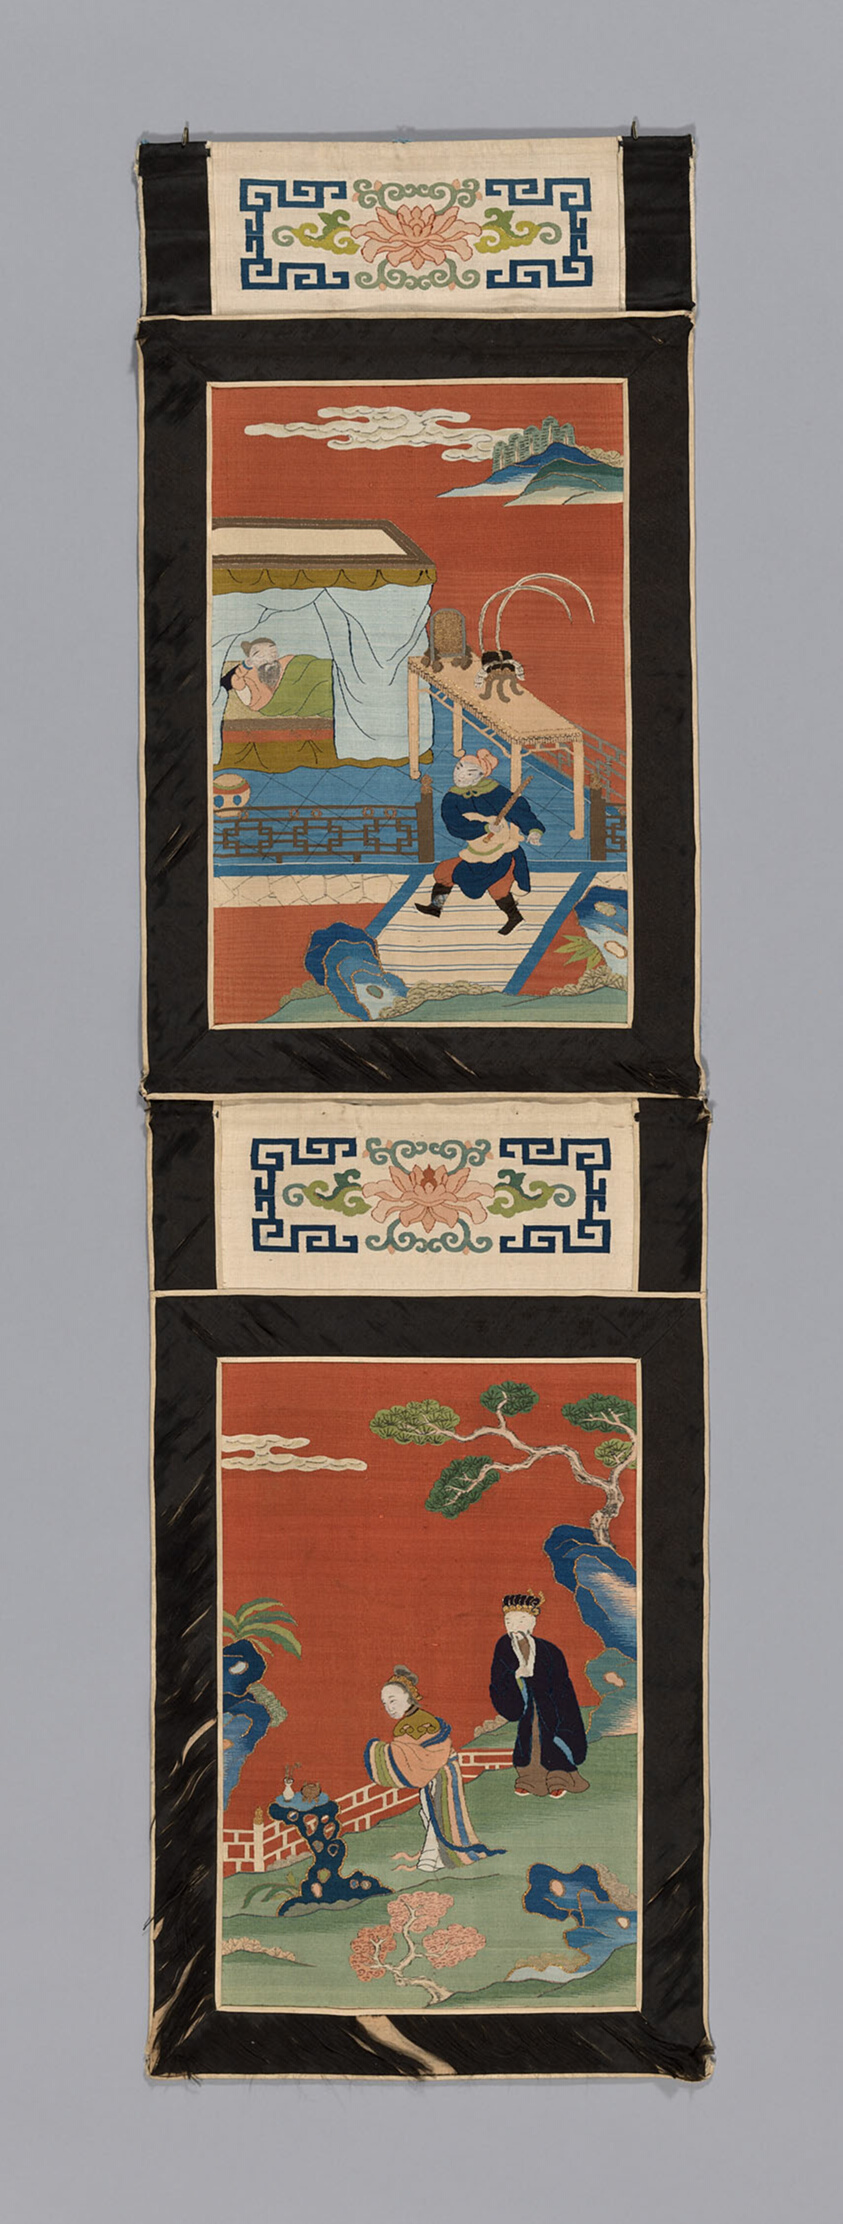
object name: Textile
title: Panel (For a Screen)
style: qing, Chinese (culture or style), asian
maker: China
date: Qing dynasty (1644–1911), 1875/1900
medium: Panel: Silk, gold-leaf-over-lacquered-paper-wrapped silk, slit tapestry weave with extended weft and interlaced outlining wefts; painted; borders: silk and cotton, warp-float faced 5:1 satin weave; inner and outer edges: silk, warp-float faced 4:1 satin weave; lining: cotton, plain weave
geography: China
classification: weaving - tapestry; weaving; textile